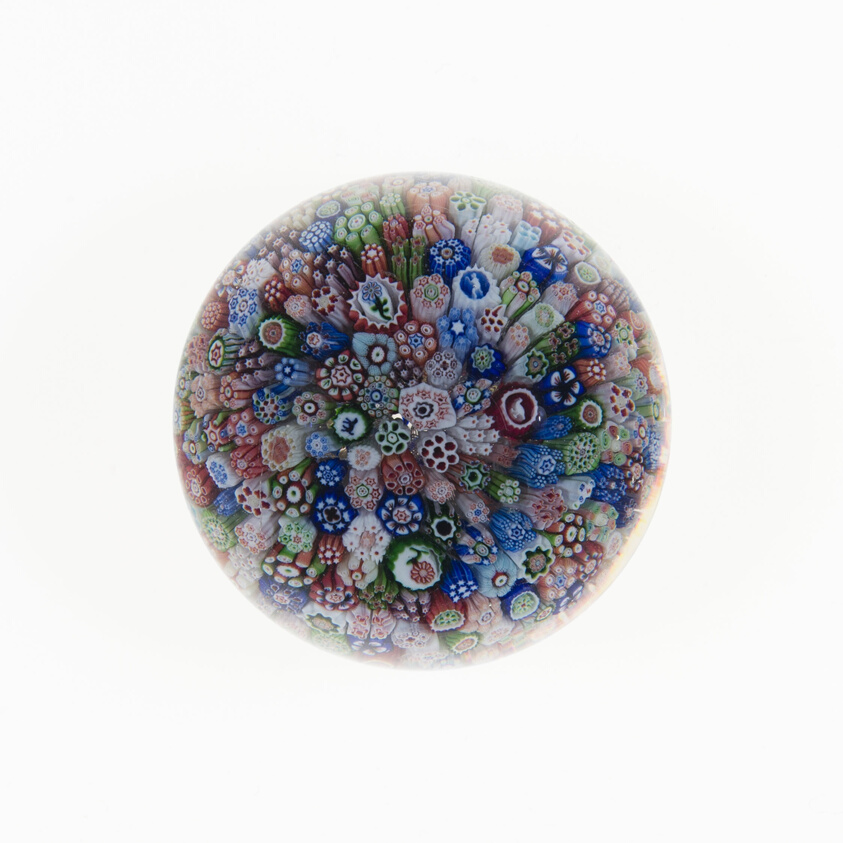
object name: Glass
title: Paperweight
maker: Baccarat Glassworks (Cristalleries de Baccarat); Lorraine, France, founded 1764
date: c. 1845/60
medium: Glass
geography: France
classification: paperweight; glass